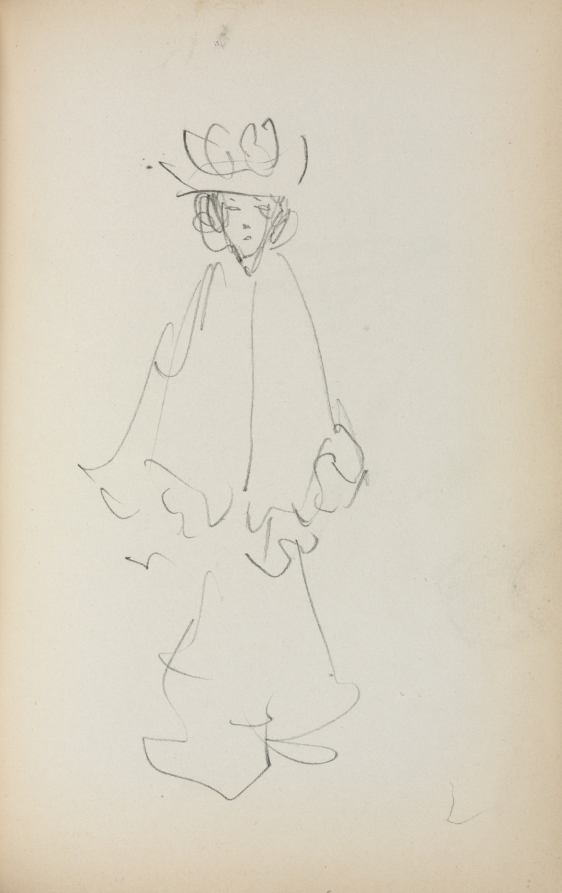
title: Italian Sketchbook: Standing Woman (page 147)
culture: America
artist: Maurice Prendergast (American, born Newfoundland [now Canada], 1858–1924)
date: 1898–1899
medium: pencil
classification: Bound Volume